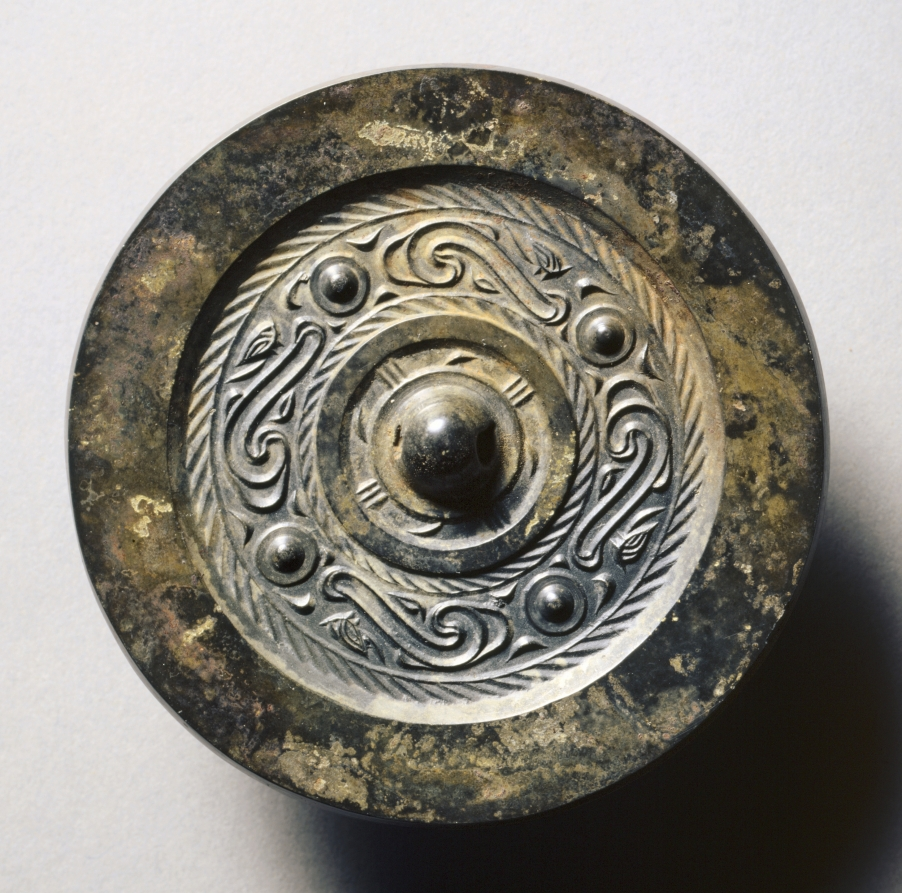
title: Mirror with Four Nipples, Quasi-Dragons, and Birds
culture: China, Western Han dynasty (206 BCE–8 CE)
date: 100–1 BCE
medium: bronze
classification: Metalwork